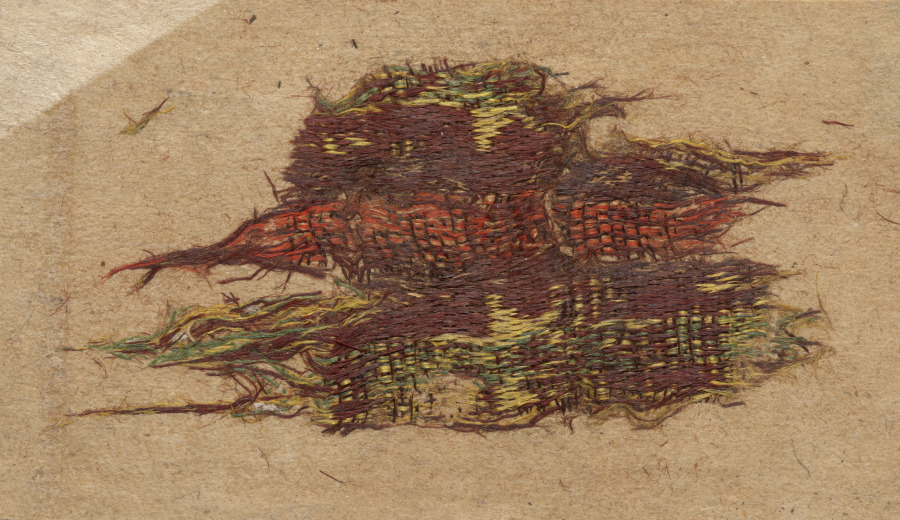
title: Fragment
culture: China or Japan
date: 700s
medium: compound twill, silk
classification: Textile